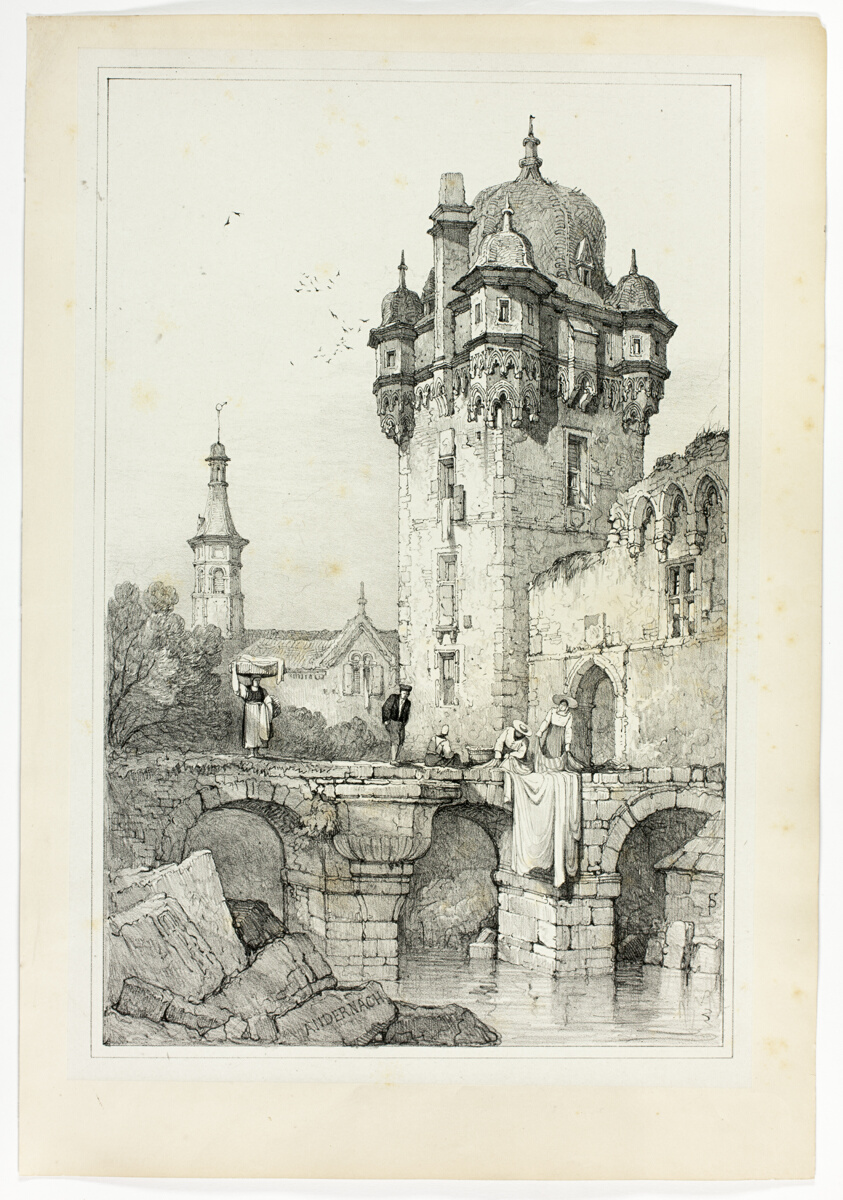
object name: Print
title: Andernach, from Facsimiles of Sketches made in Flanders and Germany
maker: Samuel Prout (English, 1783-1852); printed by Charles Joseph Hullmandel (English, 1789-1850)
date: 1833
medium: Lithograph in black on grayish-ivory chine, laid down on ivory wove paper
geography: England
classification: lithograph; print; prints and drawing